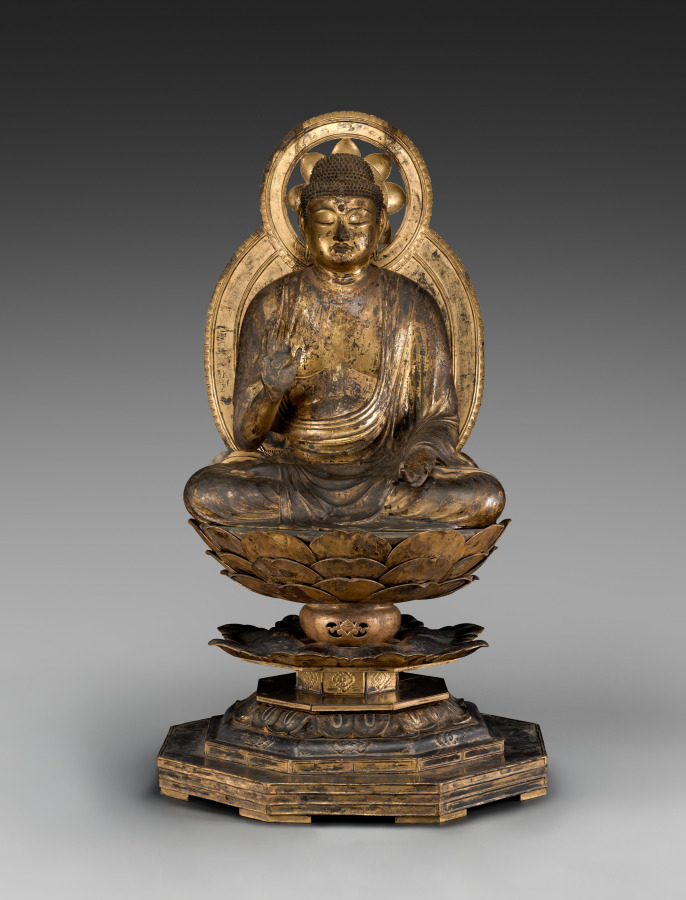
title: Seated Buddha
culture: Japan, Heian period (794–1185)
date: 1100s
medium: gilded wood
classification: Sculpture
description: Composed of a number of hollowed-out pieces of wood that were then covered with lacquer and gilding, this sculpture served as an image of worship in one of the small temples surrounding Kōfukuji, a major Buddhist temple in Nara, Japan. Like many Buddhas, this figure has its right hand positioned in a gesture meaning "fear not." The left hand is a replacement, so its original gesture, a clue to this Buddha's identity, is unknown. However, as the left foot is exposed over the garment, in lotus position, it may have been created as a Medicine Master Buddha, Yakushi Nyorai in Japanese, or the Buddha of our era, Shakyamuni.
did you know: A 1906 photo taken at Kōfukuji shows this sculpture without a halo or left hand.